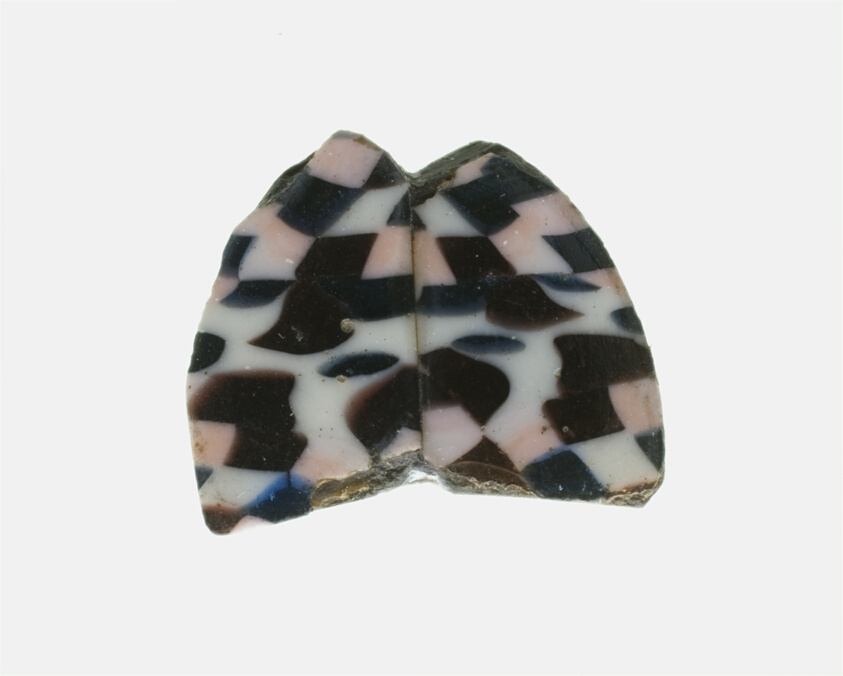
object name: Decorative Arts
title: Fragment of a Checkerboard Patterned Inlay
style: roman (ancient, style or period), ancient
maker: Roman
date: 1st century BCE–1st century CE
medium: Glass, mosaic glass technique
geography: Italy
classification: glass; inlay; ancient art; decorative arts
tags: decoration